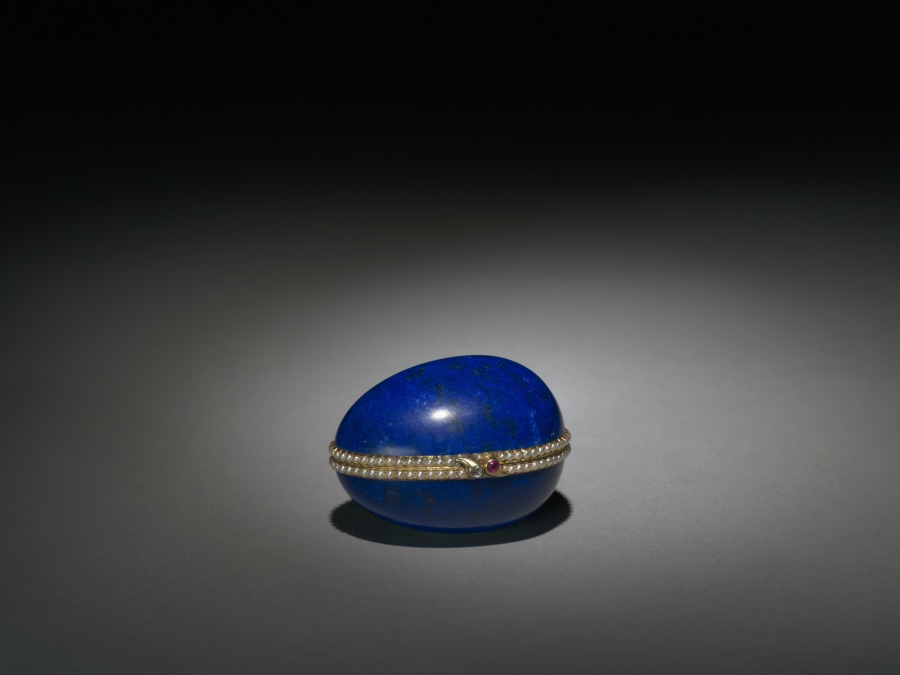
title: Lapis Lazuli Easter Egg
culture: Russia, St. Petersburg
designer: attributed to Peter Carl Fabergé (Russian, 1846–1920)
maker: attributed to House of Fabergé (Russian, 1842–1918)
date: c. 1885–90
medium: gold, enamel, lapis lazuli, pearls, diamonds, rubies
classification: Miscellaneous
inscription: Unmarked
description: Peter Carl Fabergé became the crown jeweler to the imperial court of Russia in 1885 after he produced the very first Easter egg for Tsar Alexander III to give to his wife, Empress Marie Feodorovna. Fabergé created his celebrated Easter eggs, symbols of rebirth and renewal, as gifts for the Russian imperial family every year until he had to leave the country in 1919 after the Russian Revolution. Made of gold and lapis lazuli from the Ural Mountains, this egg opens to reveal a compartment enameled to resemble an egg yolk, which contains yet another delightful surprise of an imperial crown holding a tiny ruby or pink sapphire on a chain.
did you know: This egg may have been made for one of the tsar's relatives very early in the run of imperial Easter egg production by Fabergé.